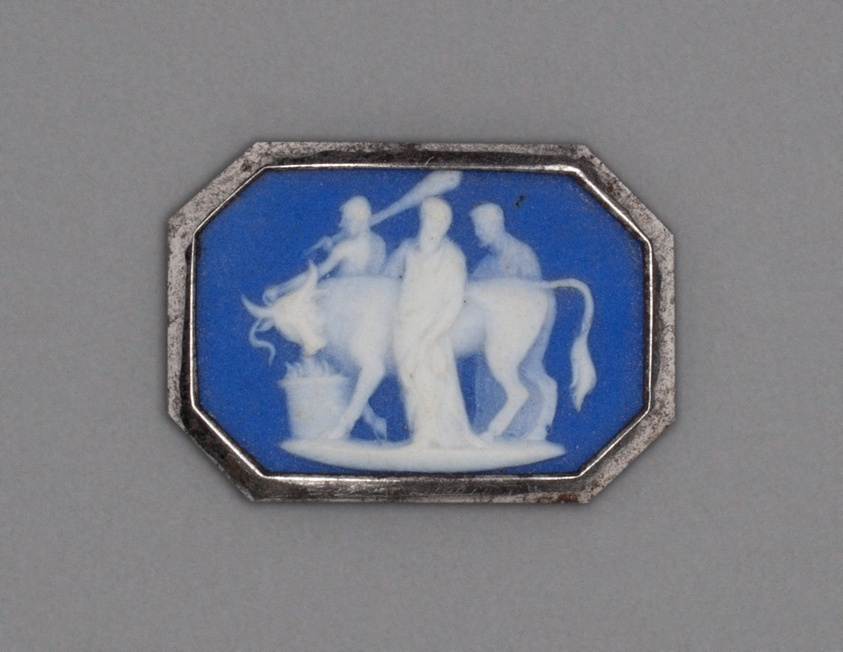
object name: Ceramics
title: Cameo with Sacrifice of a Bull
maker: Wedgwood Manufactory (England, founded 1759)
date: Late 18th century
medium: Stoneware (jasperware)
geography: Burslem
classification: cameo (sculpture); sculpture; stoneware; european decorative arts; ceramics